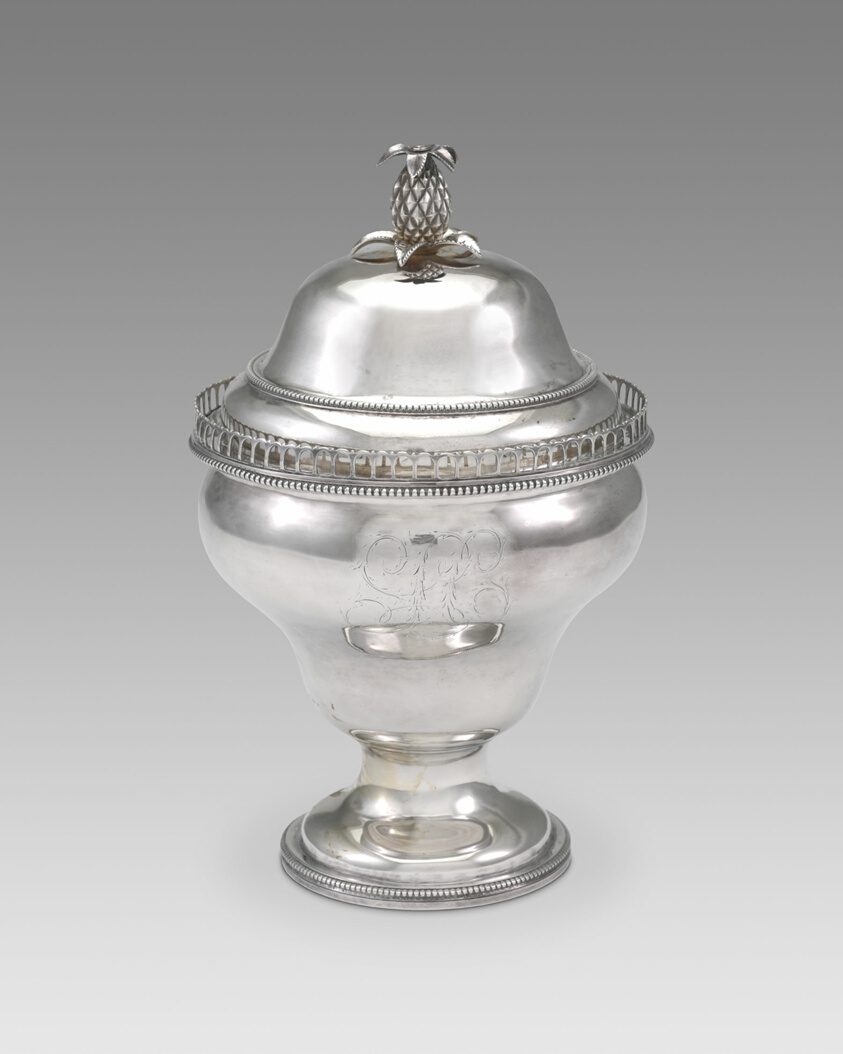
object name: Metalwork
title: Sugar Bowl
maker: Abraham Carlile; American, 1764–1837; Philadelphia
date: 1790–94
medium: Silver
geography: Philadelphia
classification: sugar bowl; silver; american decorative arts; american arts; decorative arts